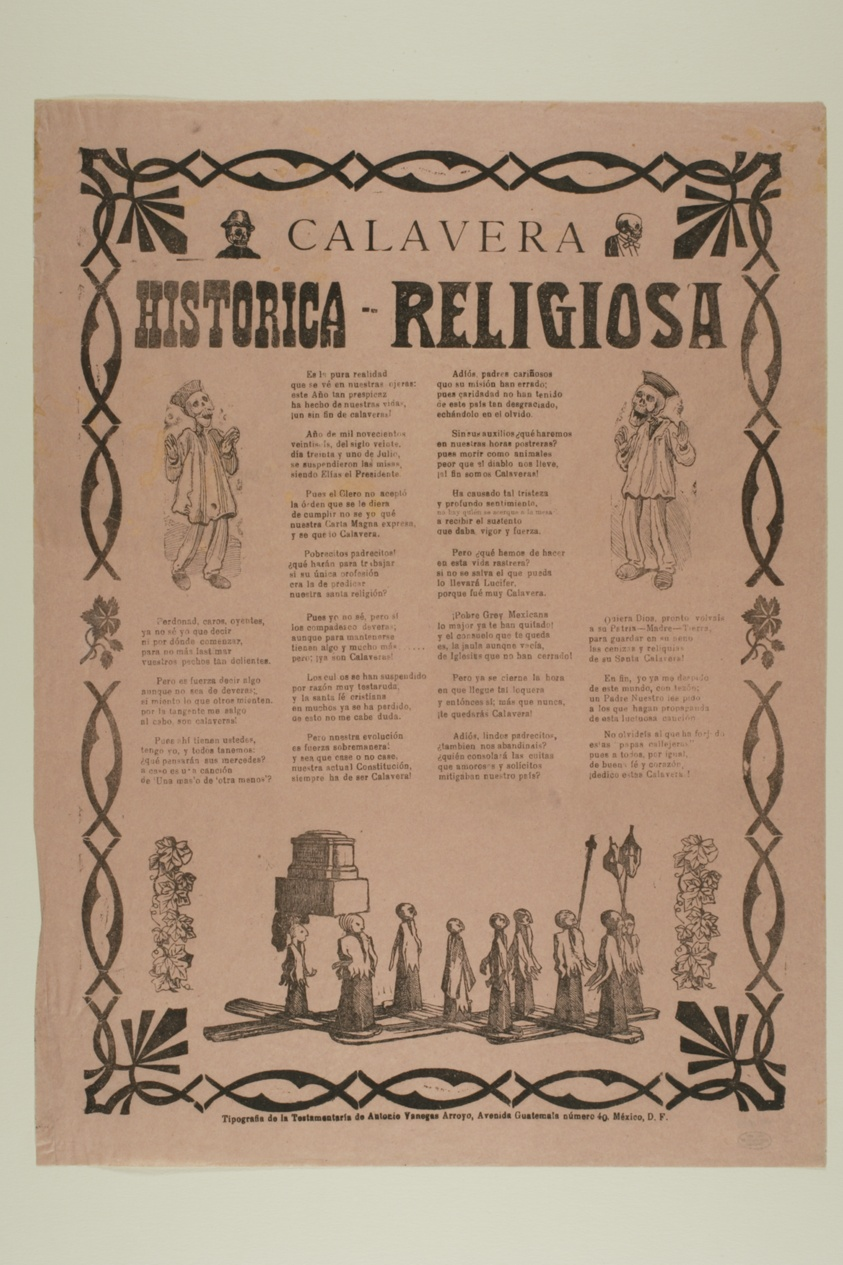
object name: Print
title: Calavera: Historica-Religiosa (Calavera: Historic-Religious)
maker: José Guadalupe Posada (Mexican, 1852-1913)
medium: Relief print on paper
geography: Mexico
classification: relief etching; print; prints and drawing